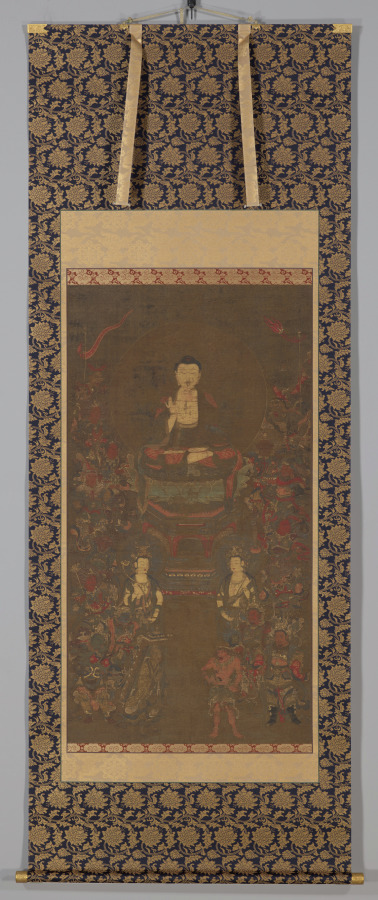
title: Shakyamuni with the Sixteen Benevolent Deities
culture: Japan, Nanbokuchō period (1336–92)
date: mid- to late 1300s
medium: Hanging scroll; ink, color, gold and cut gold on silk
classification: Painting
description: The historical Buddha Shakyamuni forms a triad with the bodhisattvas Fugen and Monju. Sixteen deities who protect the Buddhist scripture called the Great Perfection of Wisdom Sutra surround them. At the bottom left stands the Chinese monk Xuanzang, noted as a Buddhist scholar and translator of religious texts from India, including the Great Wisdom Sutra.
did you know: This painting would have been the main icon for ceremonial readings of the Great Perfection of Wisdom Sutra.